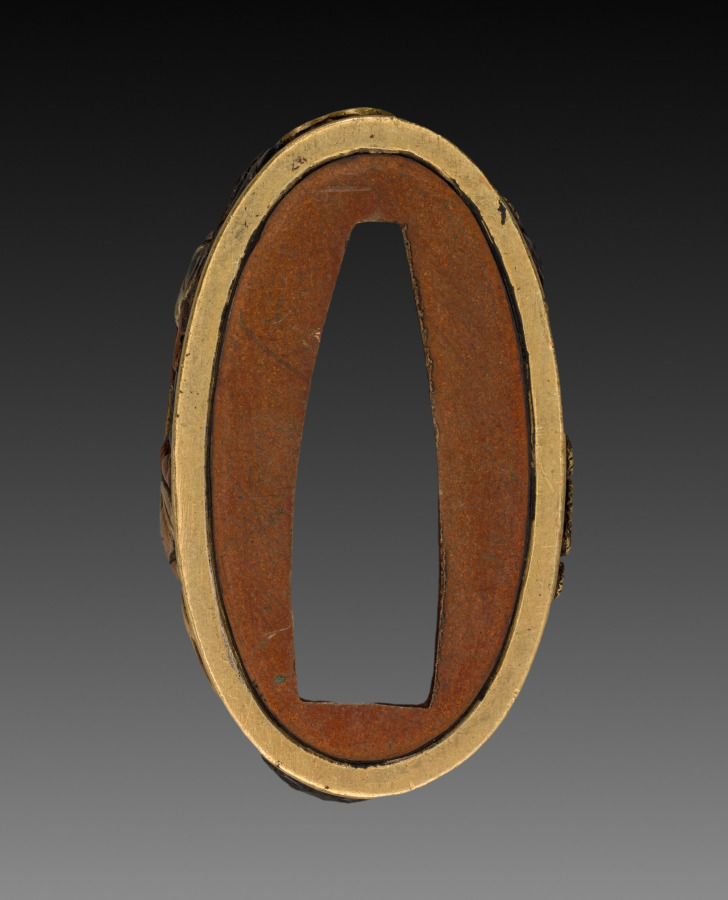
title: Sword-Hilt Collar (Fuchi)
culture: Japan, Edo period (1615–1868)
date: 1700–1850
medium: shakudo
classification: Arms and Armor